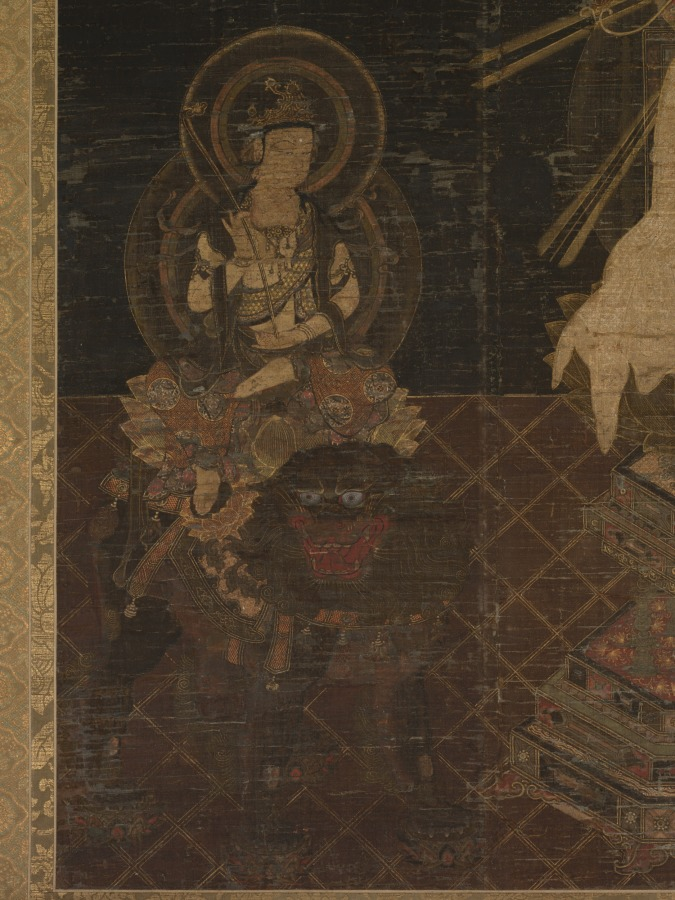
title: Shakyamuni Triad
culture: Japan, Kamakura period (1185–1333)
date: c. 1200–1333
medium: hanging scroll; ink, color, gold and cut-gold on silk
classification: Painting